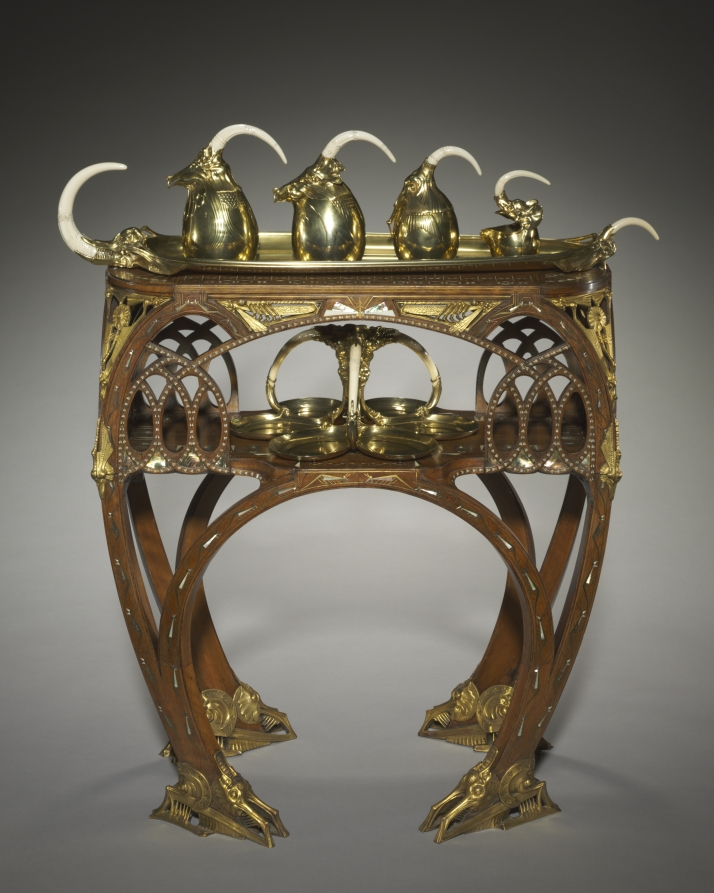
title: Tea Table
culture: France, Paris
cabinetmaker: Carlo Bugatti (Italian, 1856–1940)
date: c. 1907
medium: inlaid wood (mahogany?), cast and gilded bronze mounts, inlays of ivory or bone, metal, and mother-of-pearl (marine mussels or pearl oysters)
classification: Furniture and woodwork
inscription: signed in ligature in white metal inlay on central shelf: Bugatti.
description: Luxurious materials might catch the eye first, but a closer look reveals the imaginary creatures that adorn the surface of this table. Featuring elaborate arches, a favorite motif that appeared throughout Bugatti's furniture, this fantastical imagery is a window into the designer's expressive imagination.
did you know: Carlo Bugatti's sons achieved illustrious careers of their own. Rembrandt Bugatti (1884-1916) became a celebrated sculptor, and Ettore Bugatti (1881-1947) manufactured luxurious automobiles and racing cars.